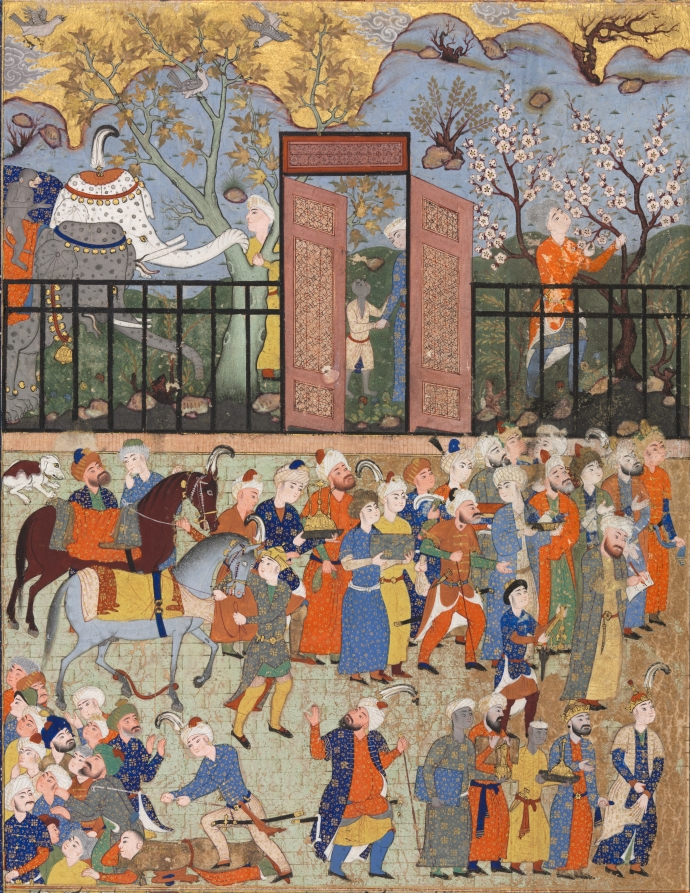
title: King Luhrasp Ascends the Throne: a Processon Arrives at Court, recto of the left folio of a double-page composition from a Shahnama (Book of Kings) of Firdausi (940-1019 or 1025)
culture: Iran, Shiraz, Safavid period (1501-1722)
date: c. 1560–90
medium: opaque watercolor, ink, and gold on paper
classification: Manuscript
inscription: Script: Nasta'liq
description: This scene of a procession arriving at court was surely completed by the court scene itself. The subject of the frontispiece had nothing to do with the text that it accompanied, and the text has not been identified.